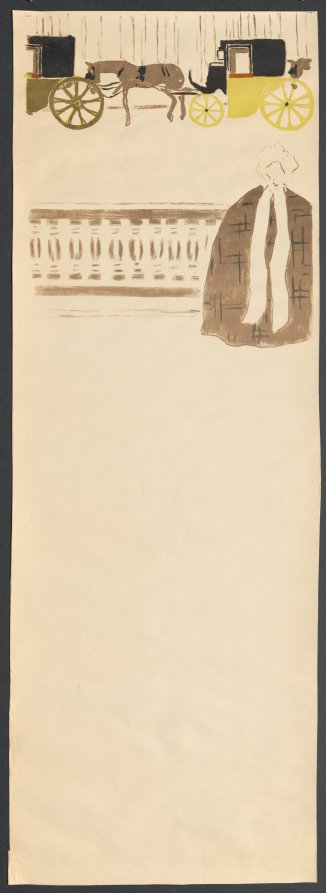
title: Nursemaids’ Promenade, Frieze of Carriages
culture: France, 19th century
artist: Pierre Bonnard (French, 1867–1947)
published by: Molines, Galeries Lafayette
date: 1895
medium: color lithograph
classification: Print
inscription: The third panel signed with the artist's monogram in the stone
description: This charming scene of a nanny and her three charges extends across four panels meant to be mounted as a folding screen. Pierre Bonnard emulated the solidly colored flat forms of Japanese color woodcut prints, which he collected. He featured the screen in his first solo exhibition at Paris's prestigious Galeries Durand-Ruel in 1896.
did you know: Although this screen was issued in an edition of 110, only about 20 copies survive today.